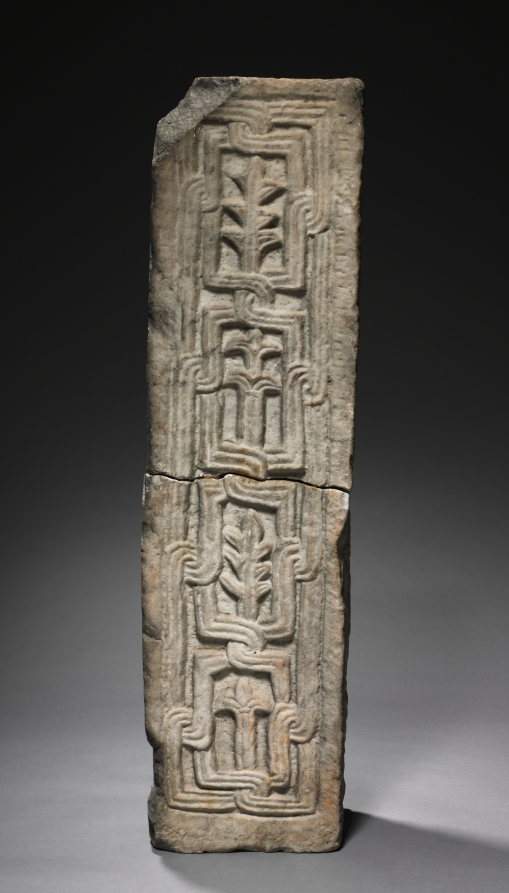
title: Transenna Post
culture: Lombardic, Italy, Rome, Migration period, 8th-9th Centuries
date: 700s-800s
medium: marble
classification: Sculpture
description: In Christian architecture a transenna is an openwork screen of stone or metal enclosing a shrine. These transenna elements were found in Rome; the posts were said to have been excavated on the Coelian Hill and may have originally formed part of the transenna of the Church of San Saba. The Lombards were an ancient Germanic-speaking tribe that settled in Italy after 568. Their artistic tradition was originally centered on small objects of personal adornment like buckles and brooches. After occupying Italy, the Lombards found themselves in contact with large-scale sculpture of classical and early Christian origin that, by the end of the 700s, they had learned to adopt and imitate, as seen here.